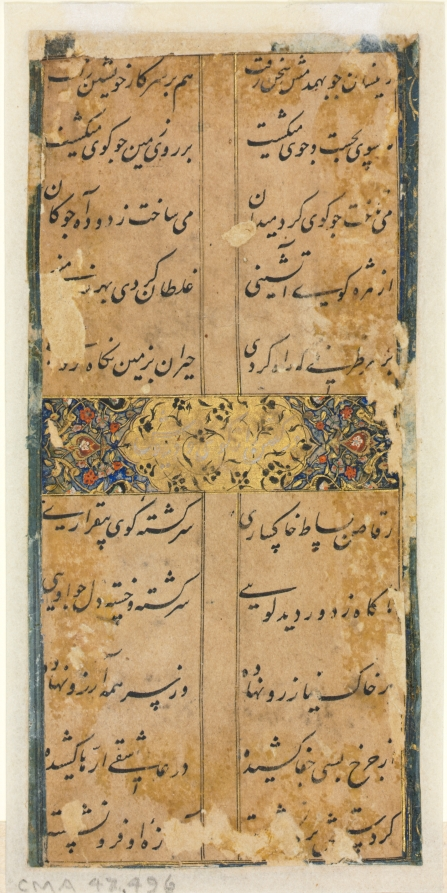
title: Persian Verses (verso)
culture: Iran, Qazvin or Isfahan, Safavid period (1501-1722)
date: c. 1450–1500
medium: ink, opaque watercolor and gold on paper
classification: Manuscript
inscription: script: Nasta'liq